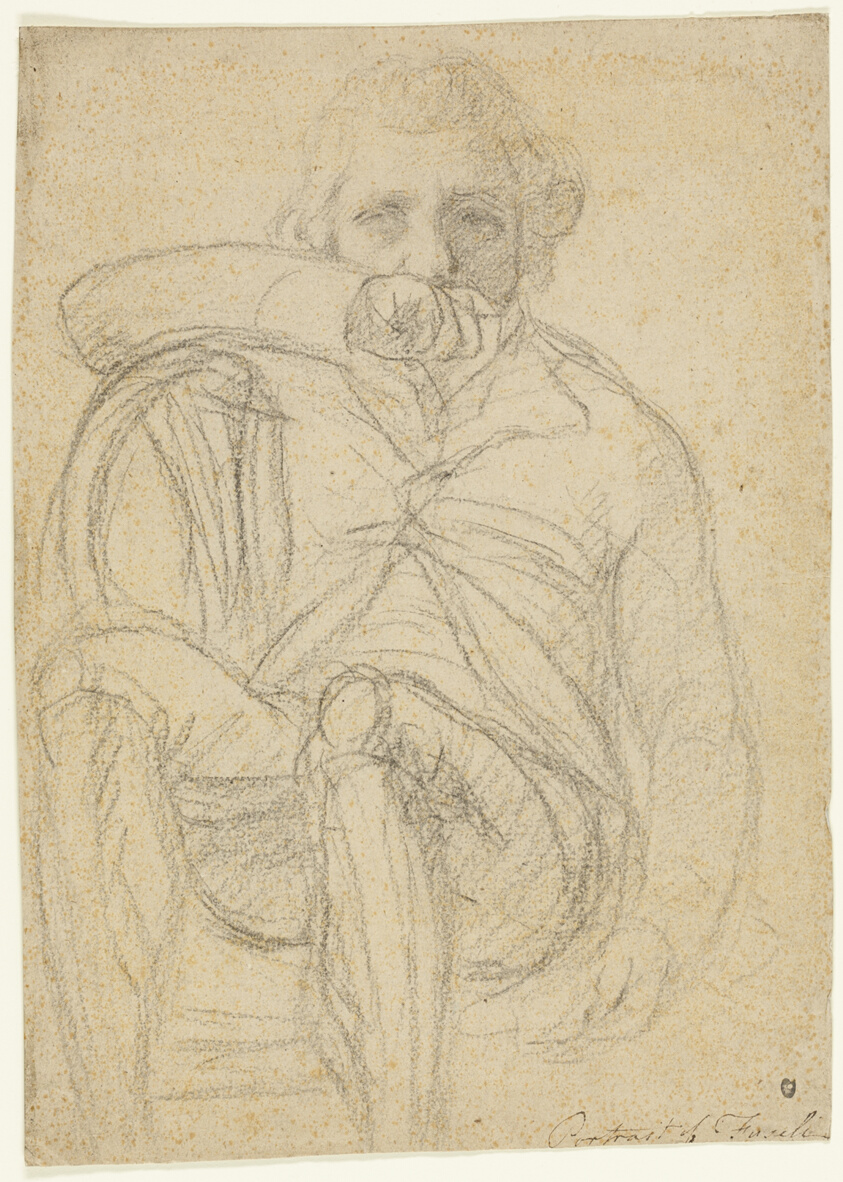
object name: Drawing and Watercolor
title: Portrait of Fuseli (recto); Sketch of a Hand (verso)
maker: Attributed to Henry Fuseli; Swiss, active in England, 1741-1825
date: 1761/1825 (recto); 1770/80 (verso)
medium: Black chalk (recto), and black and white chalk on gray prepared ground (verso), on tan wove paper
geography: England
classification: chalk; drawings (visual works); prints and drawing; paper